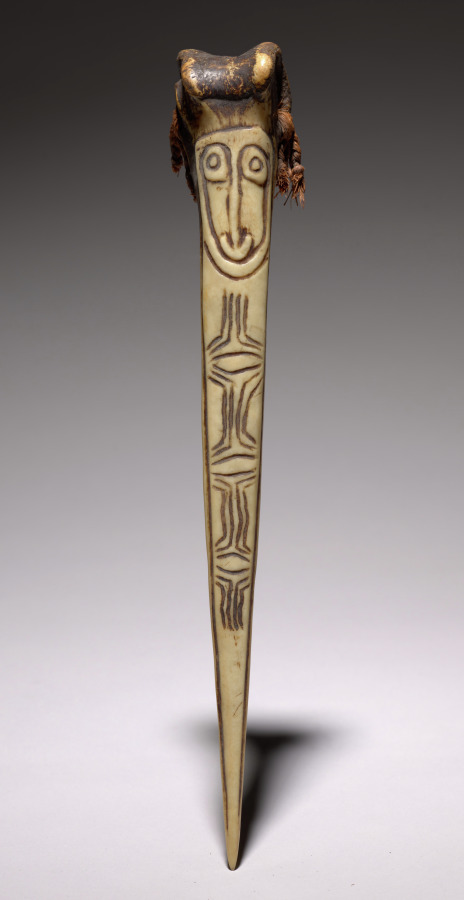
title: Dagger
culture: Melanesia, Papua New Guinea, Sepik River region, 19th century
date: c. 1880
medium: cassowary bone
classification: Sculpture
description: This dagger is decorated with an incised human face and a geometric pattern.